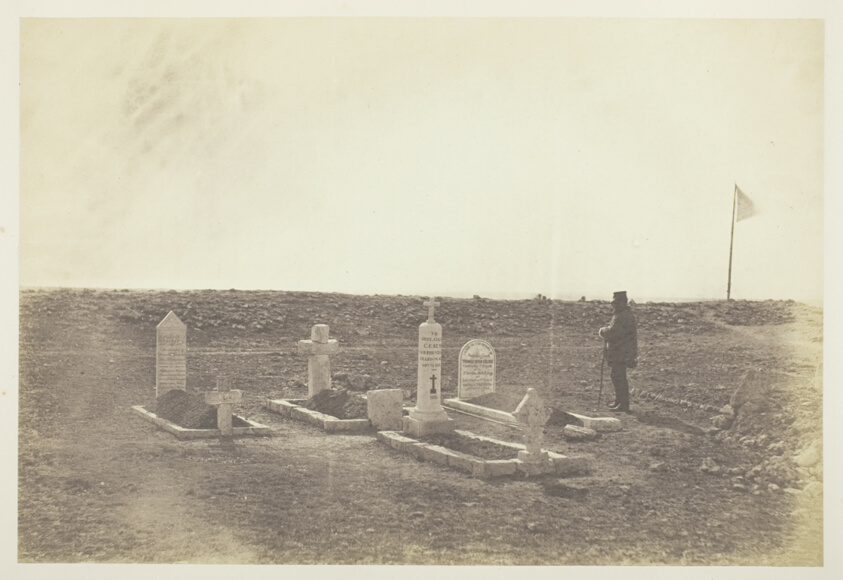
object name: Photograph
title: The Tombs of the Generals on Cathcart's Hill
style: 19th century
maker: Roger Fenton (English, 1819–1869)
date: 1855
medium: Salted paper print, plate 13 from the album "Photographs Taken in the Crimea" (1856)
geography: England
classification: salted paper print; photographic process; photography; photograph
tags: Collected by Hugh Edwards, Crimea 1856